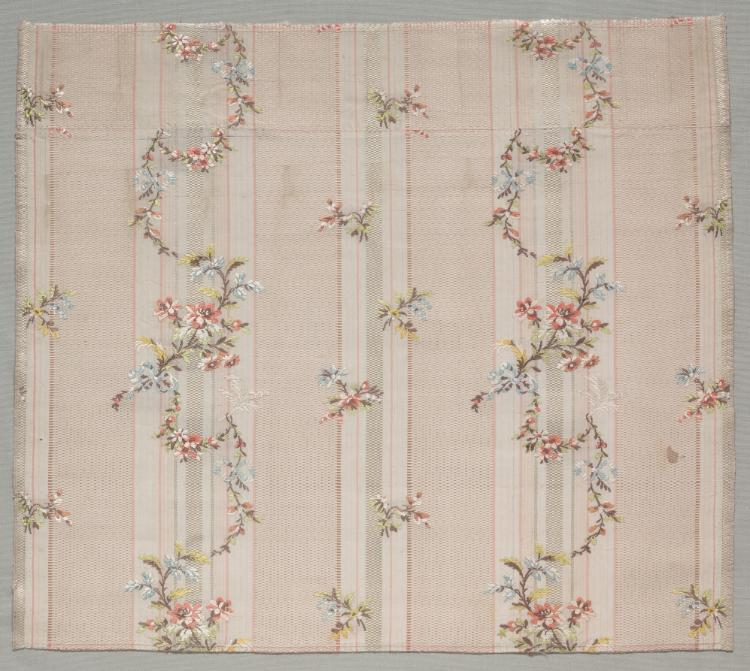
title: Taffeta Fragment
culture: France, 18th century, Period of Louis XVI (1774-1793)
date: 1774–1793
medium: taffeta, warp-patterned and brocaded; silk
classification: Textile